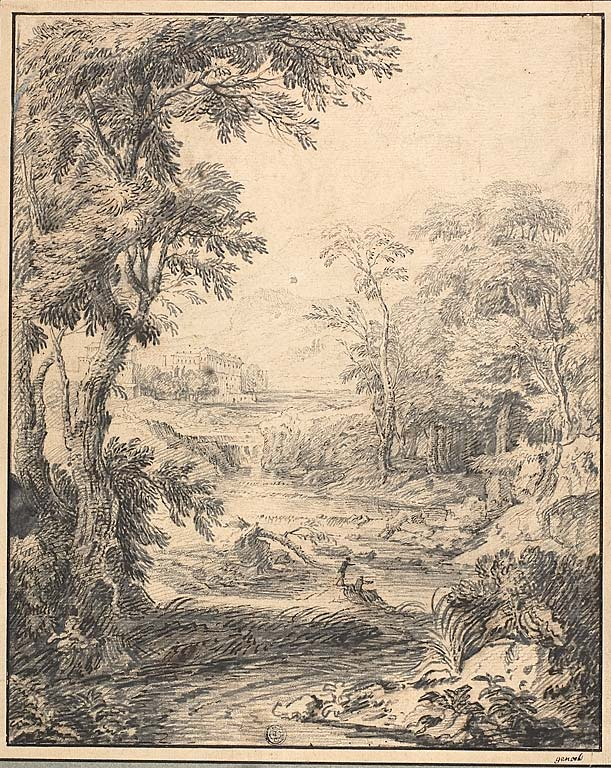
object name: Drawing and Watercolor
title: River Landscape with Two Figures in Foreground, Castle in Distance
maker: Abraham Genoels II; Flemish, 1640-1723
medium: Black chalk, with pen and brown ink, on tan laid paper, laid down on card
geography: Flanders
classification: chalk; drawings (visual works); prints and drawing